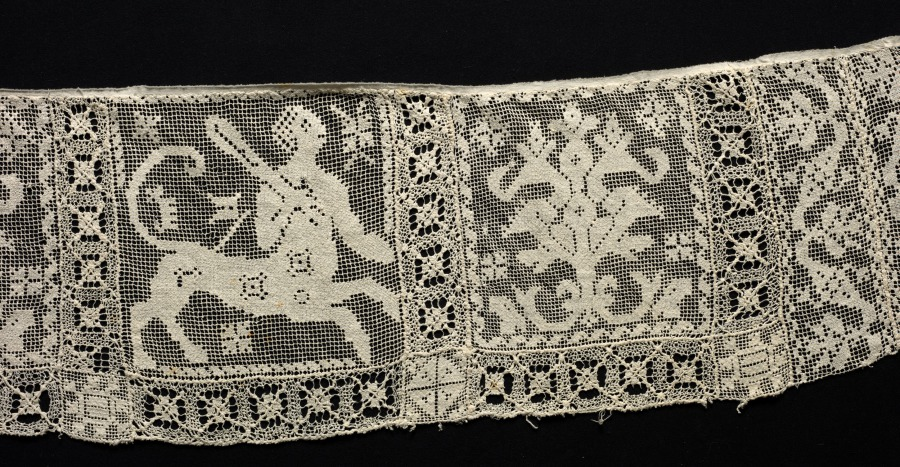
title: Band with Various Fantastic Creatures and Vegetal Patterns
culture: Italy, 1800s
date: 1800s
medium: Bleached linen (est.): needle lace, filet/lacis (knotted ground and darned in two directions)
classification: Lace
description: The reversed and backward orientation of many of the squares in this band of lace suggests that this was not their original layout. They were most likely taken apart and later joined back together in a disoriented manner.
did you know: The square showing a man in midair above a bull-like creature is reminiscent of the Minoan "Bull Leaping" fresco at the Knossos palace complex.